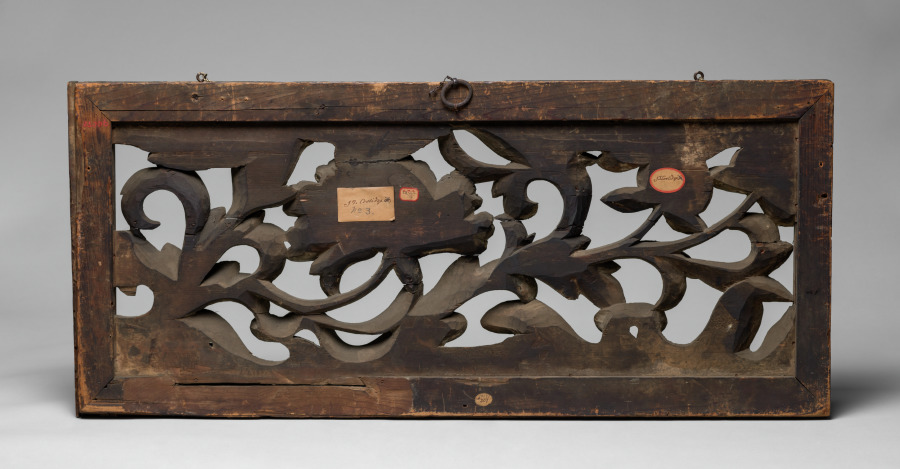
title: Lotus and Waves (Rama)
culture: Japan, Edo period (1615–1868)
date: c. 1800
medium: wood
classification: Wood